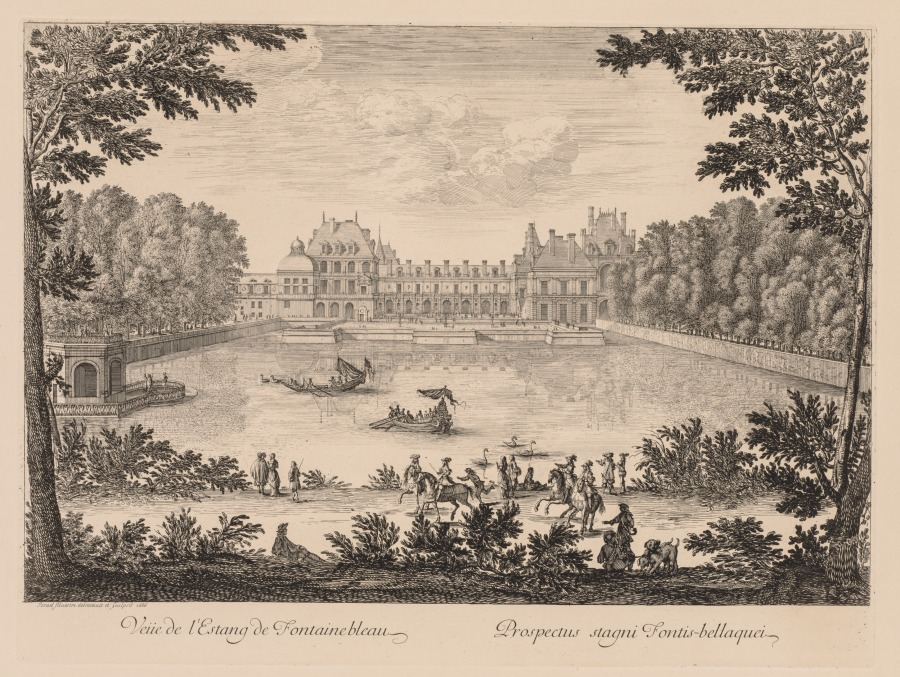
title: Vue de l'Etang de Fontainebleau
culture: France, 17th century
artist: Israël Silvestre (French, 1621–1691)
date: 1666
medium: engraving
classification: Print